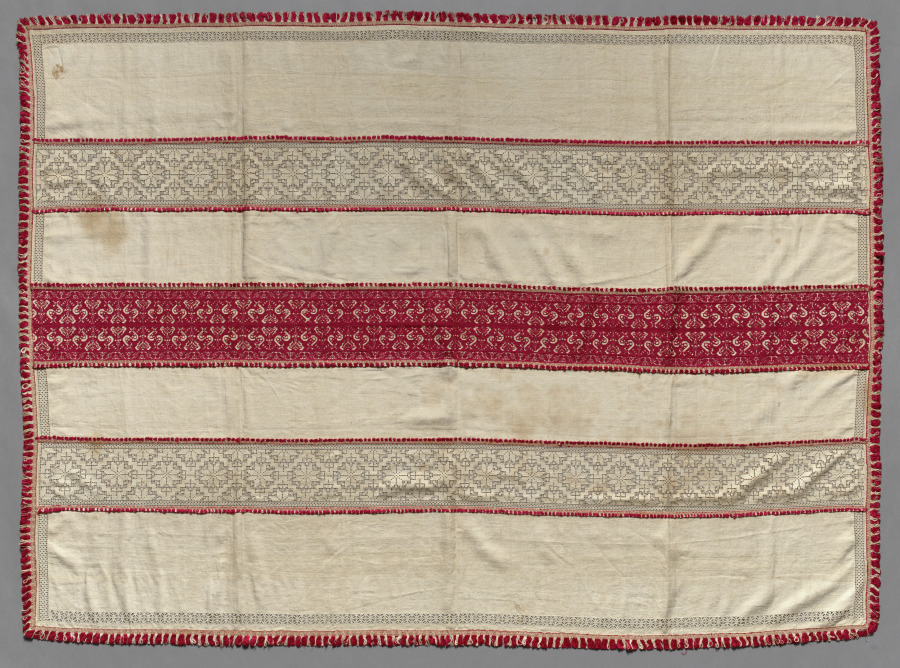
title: Embroidered Table Cover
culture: Italy, 17th century (or later copy)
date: 1600s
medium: embroidery; silk on linen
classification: Embroidery